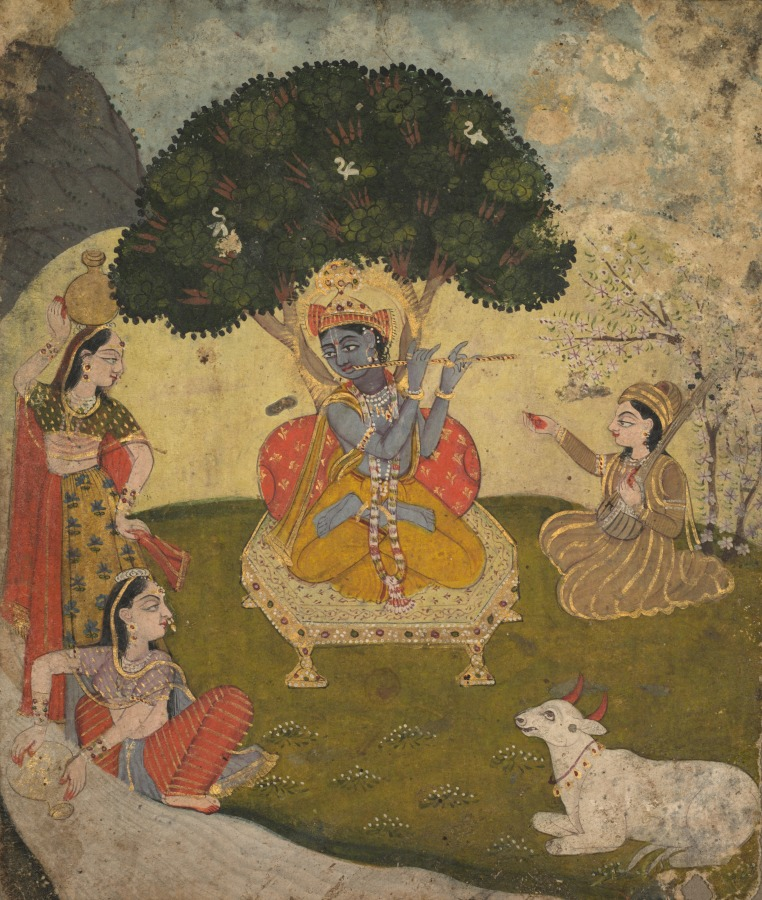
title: Krishna and Gopis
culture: India, Rajasthan, Jaipur, 19th century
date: mid 1800s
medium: Gum tempera and gold on paper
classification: Painting